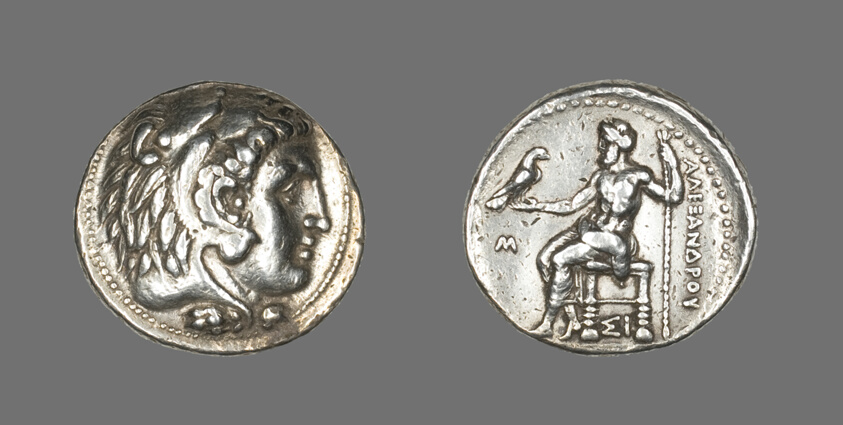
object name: Coin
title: Tetradrachm (Coin) Portraying Alexander the Great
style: late classical, ancient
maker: Greek; minted in Sidon, ancient Phoenicia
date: 336-323 BCE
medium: Silver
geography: Syria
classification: coin; ancient art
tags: alexander the great, goddesses, gods (deities), lions, chairs, bird, zeus